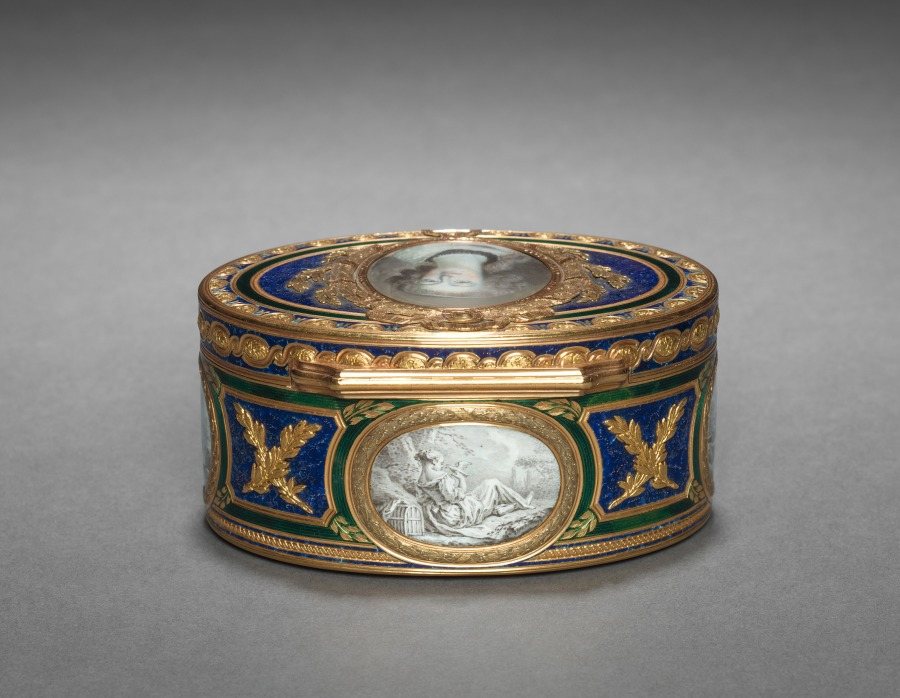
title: Snuff Box (Tabatière) with Portrait of Marie Antoinette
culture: France, 18th century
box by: Pierre-François-Mathis de Beaulieu (French)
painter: François Dumont (French, 1751–1831)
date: 1768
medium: watercolor on ivory in a gold and enamel box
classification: Enamel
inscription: [Maker's mark of Pierre-François-Mathis de Beaulieu, master goldsmith in 1768, inside cover]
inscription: [Charge mark of Jean-Jacques Prévot, 1762-1768, inside cover]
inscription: [Warden's mark of Paris, 1768-1769, inside cover]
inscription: [Discharge mark of Julien Alaterre, Paris, 1768-1774, on neck at right]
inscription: [Inside box, the letter]: "F"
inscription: [On bezel at left, engraved number]: "627"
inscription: [On front of bezel, engraved signature]: "Ve Georges Beaulieu à Paris"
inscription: [On right of miniature portrait, the letter]: "D"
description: This box was created through the collaboration of two skilled and well-known artisans of the period, master goldsmith Pierre-François-Mathis de Beaulieu and celebrated miniature painter François Dumont. The portrait of Marie Antoinette on the box's lid is painted in Dumont’s own style while those on the sides and bottom of the box take inspiration from the work of painter François Boucher, known for his pastoral scenes in the Rococo style.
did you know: Marie Antoinette, queen consort of French King Louis XVI and great patron of the decorative arts, was executed in 1793 at the end of the French Revolution.